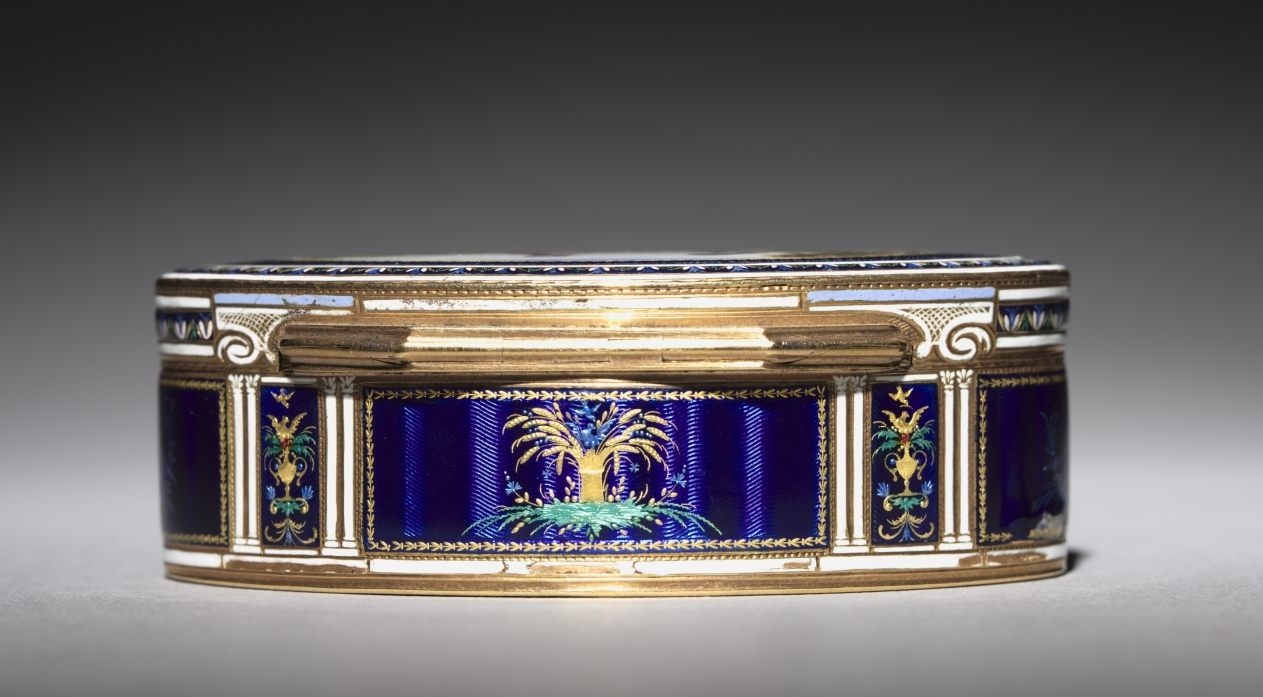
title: Box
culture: Switzerland, Geneva, late 18th Century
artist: Georges Rémond et Cie (Swiss)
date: late 1700s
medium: gold and enamel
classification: Enamel